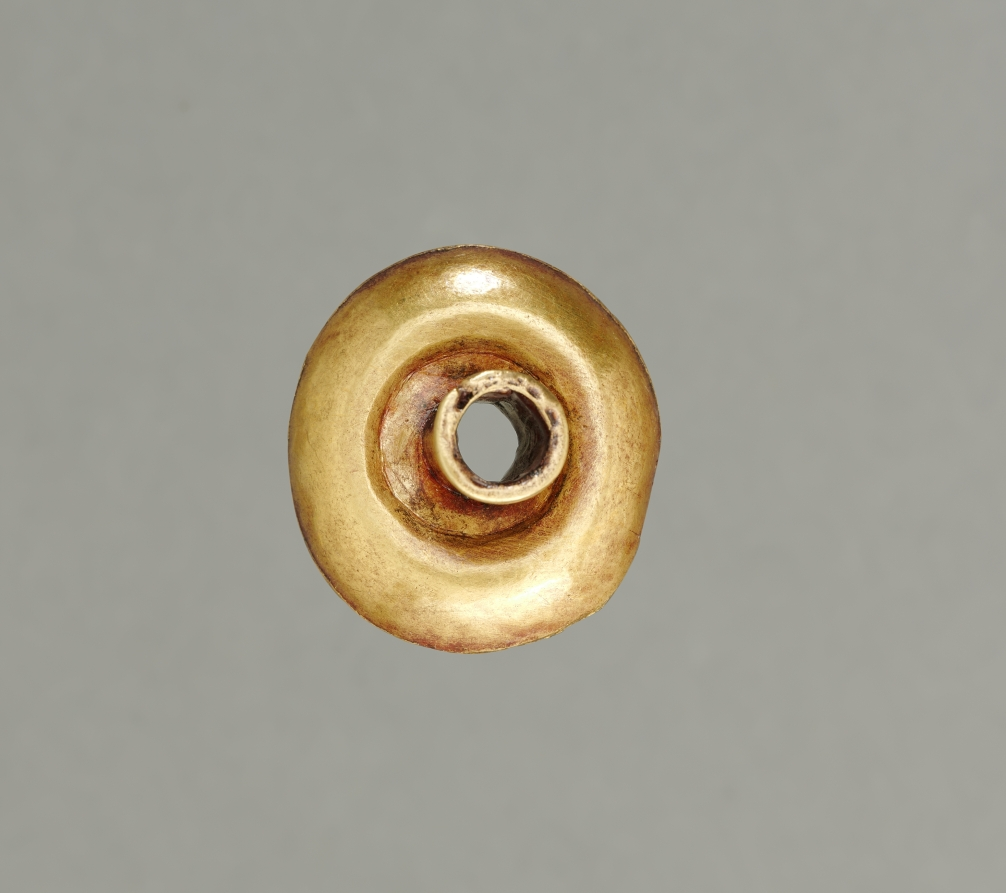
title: Ear Ornament(?)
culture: Peru, North Highlands, Chavín de Huantar(?), Chavín style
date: 500–200 BCE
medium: hammered and cut gold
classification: Metalwork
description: There seems to be a link between Chavín religion and appearance of the Andes’ first large precious-metal objects, made using revolutionary new metallurgical processes. Chavín may have developed these technical innovations to express the inexpressible, the "wholly other" nature of its religion. In many areas, elite men and women wore the ornaments as emblems of their ties to this religion, and eventually were buried with them. These 16 objects, along with three others not in the museum’s collection, are said to have come as a group from Chavín itself.